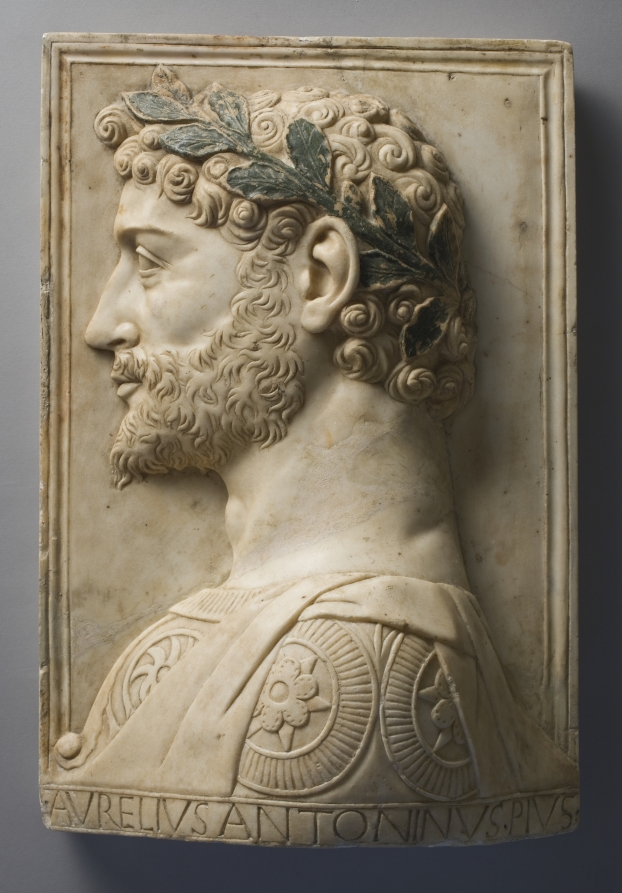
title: Aurelius Antoninus Pius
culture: Italy, Lombard School, late 15th century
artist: Gregorio di Lorenzo (Italian, c. 1436–1504)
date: late 1400s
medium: marble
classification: Sculpture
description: A laurel wreath rests on this Roman emperor’s finely articulated corkscrew curls, underscoring his military triumphs. While many ancient and classically inspired marble sculptures were painted, the survival of pigments is rare. In addition to the vibrant green coloring, traces of gold also remain on the leaves.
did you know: The artist can be identified by his distinctive flame-shaped curls forming the beard.